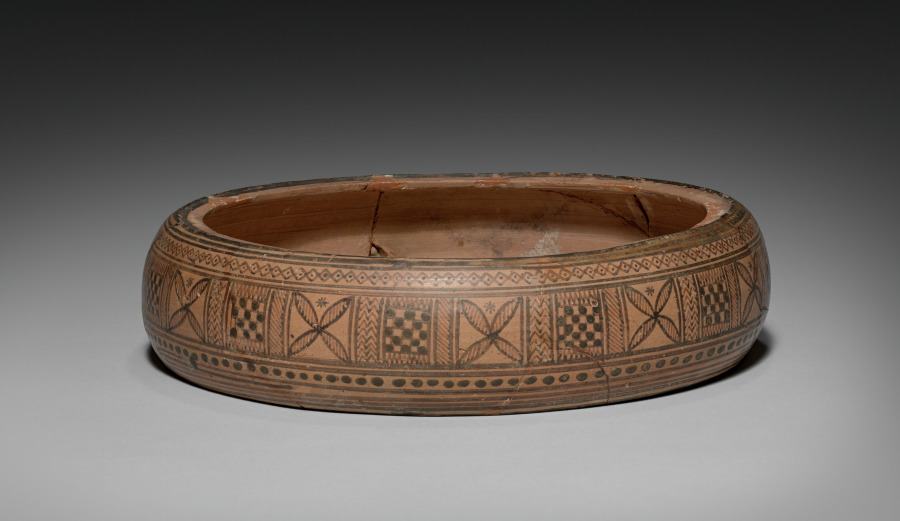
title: Geometric Horse Pyxis (Cylindrical Box)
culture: Greek, Attic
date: c. 760–750 BCE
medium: ceramic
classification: Ceramic